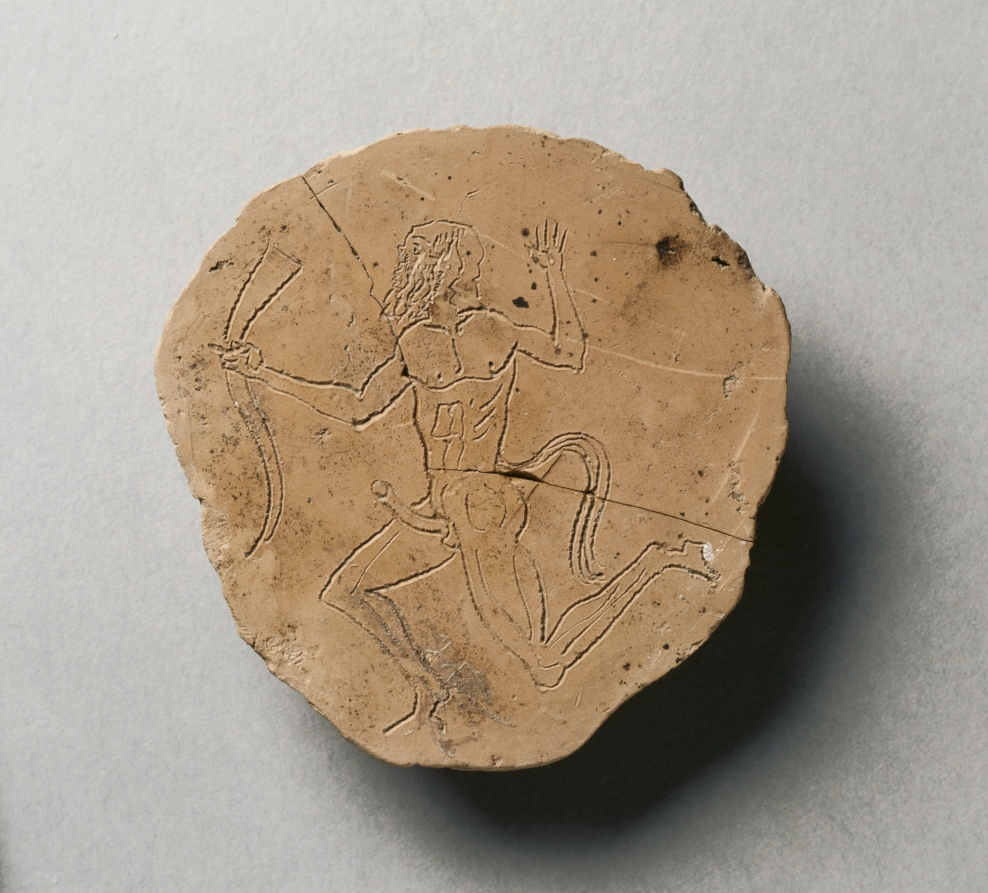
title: Gorgoneion Plaque with Incised Figure of a Dancing Satyr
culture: Greece, South Italy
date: c. 525–475 BCE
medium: terracotta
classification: Sculpture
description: Probably meant to decorate the outside of a wooden coffin or other tomb furniture, this small mold-made terracotta plaque is one of two in the collection (click here for the other). Both bear gorgoneia, or frontal Gorgon faces, with snaky hair, sharp teeth, and protruding tongue, perhaps meant to ward off evils. Curiously, this plaque also features decoration on its back side, in the form of a spirited dancing satyr incised into the clay before firing. Since this satyr would not have been visible once the plaque was in place, its purpose is uncertain. Was it simply diversion for the artisan who made it, or meant to protect the spirit of the deceased?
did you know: This plaque includes a very rare ancient sketch: a satyr incised on the reverse surface.